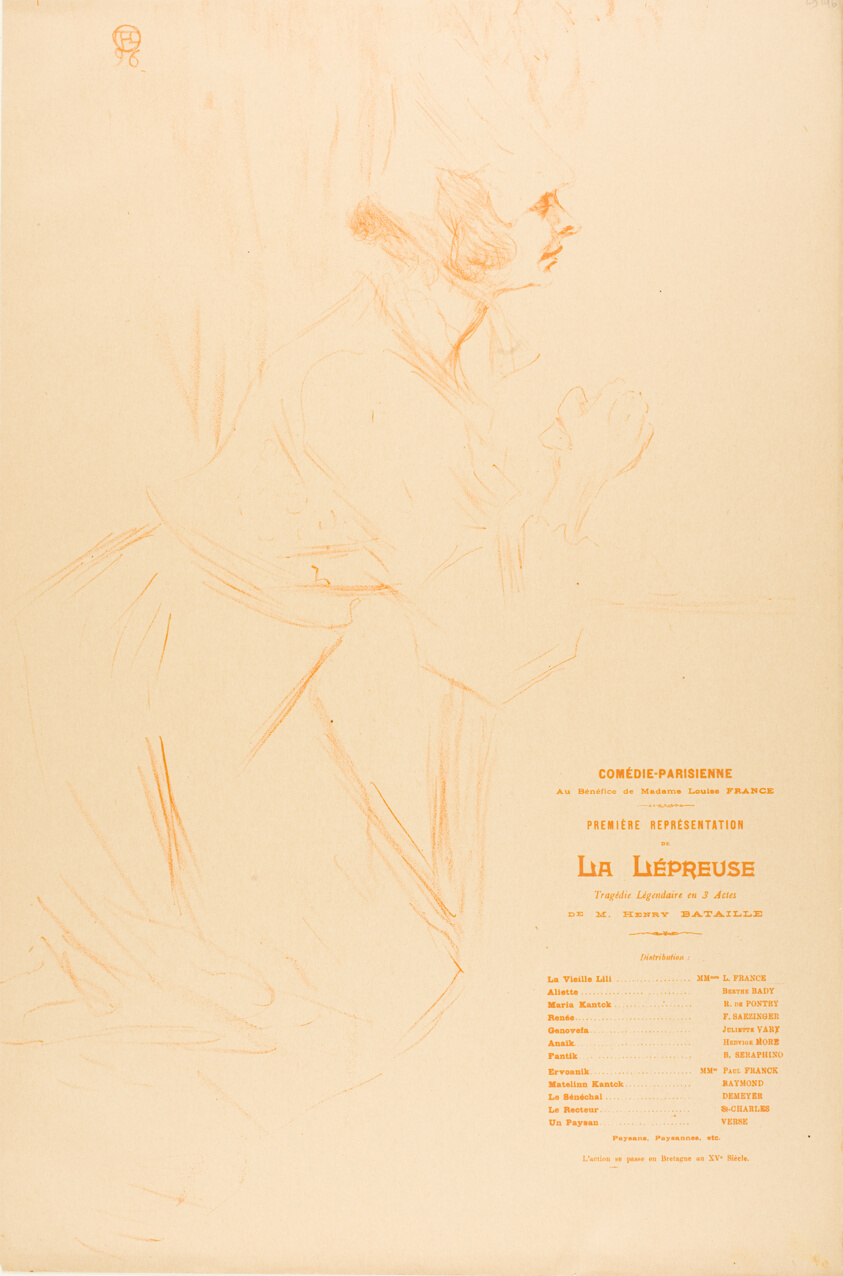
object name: Print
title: Program for La Lépreuse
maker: Henri de Toulouse-Lautrec (French, 1864-1901)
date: 1896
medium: Color lithograph on tan wove paper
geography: France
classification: lithograph; print; prints and drawing